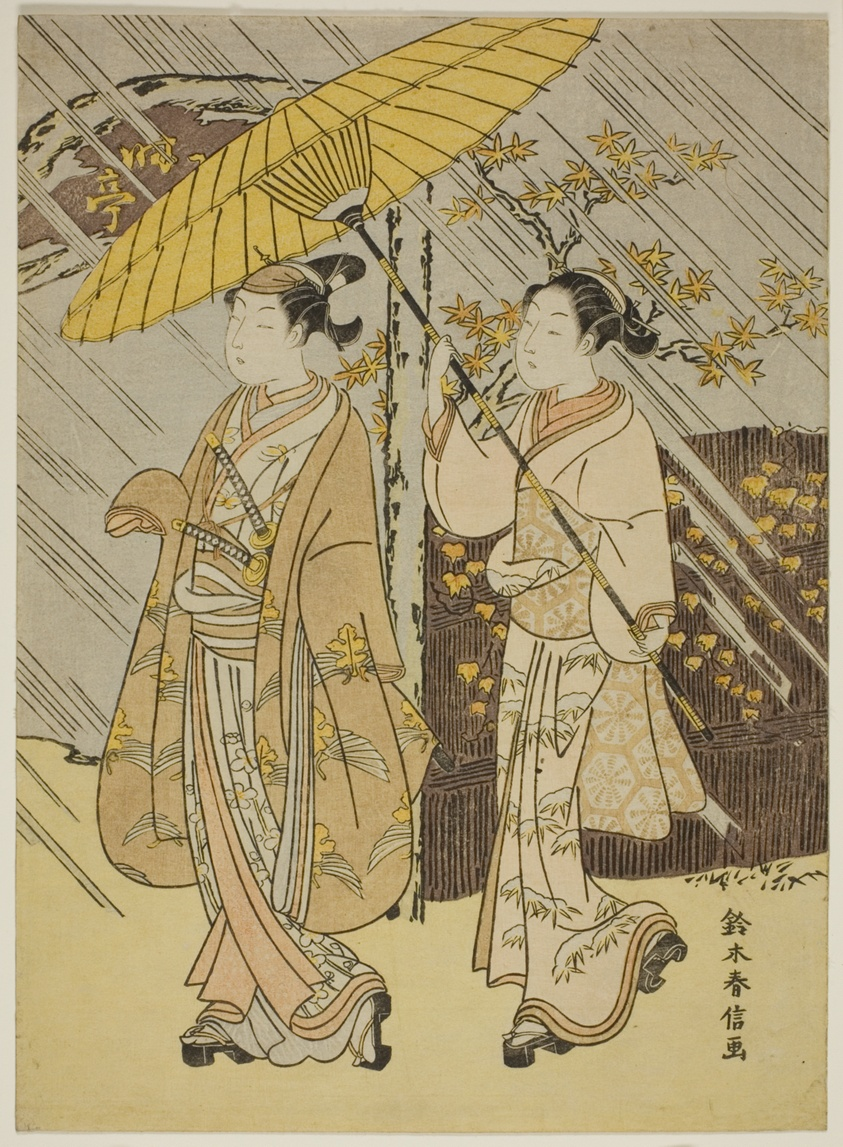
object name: Print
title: A Young Male Actor on Parade in Autumn Rain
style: Japanese (culture or style)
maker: Suzuki Harunobu 鈴木 春信; Japanese, 1725 (?)-1770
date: c. 1765/70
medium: Color woodblock print; chuban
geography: Japan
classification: woodblock print; print; asian art